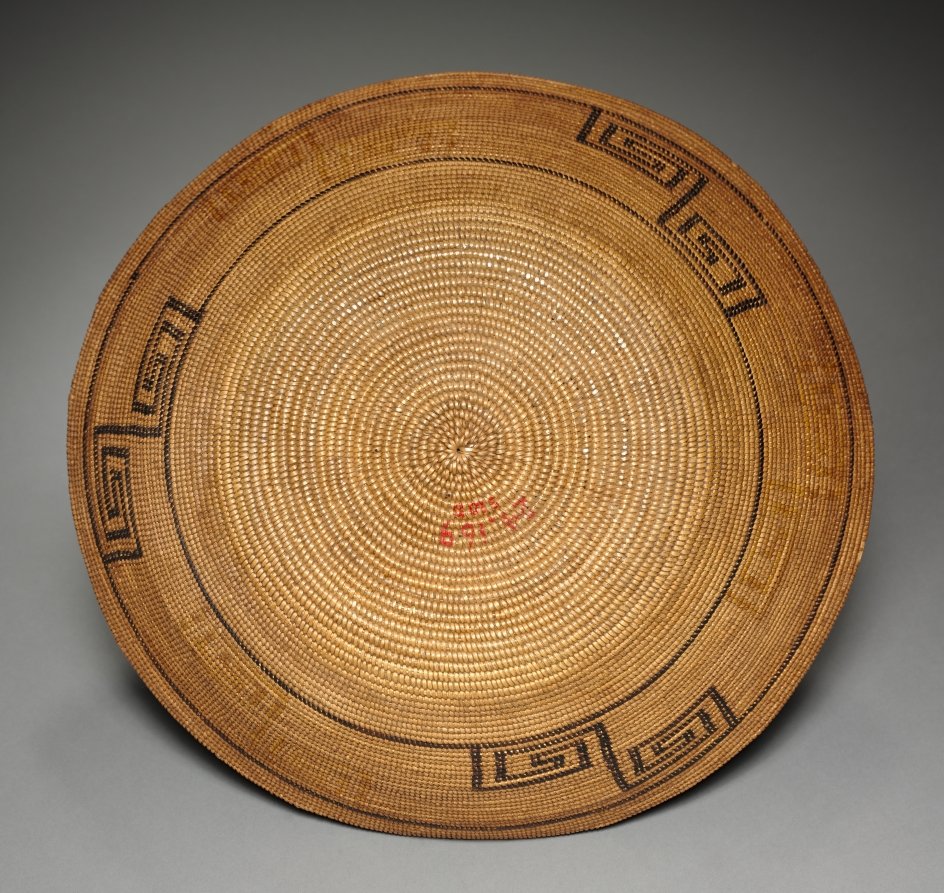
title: Food Bowl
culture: California, Mission, Late 19th- Early 20th century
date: c 1875– 1924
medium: coiled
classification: Basketry